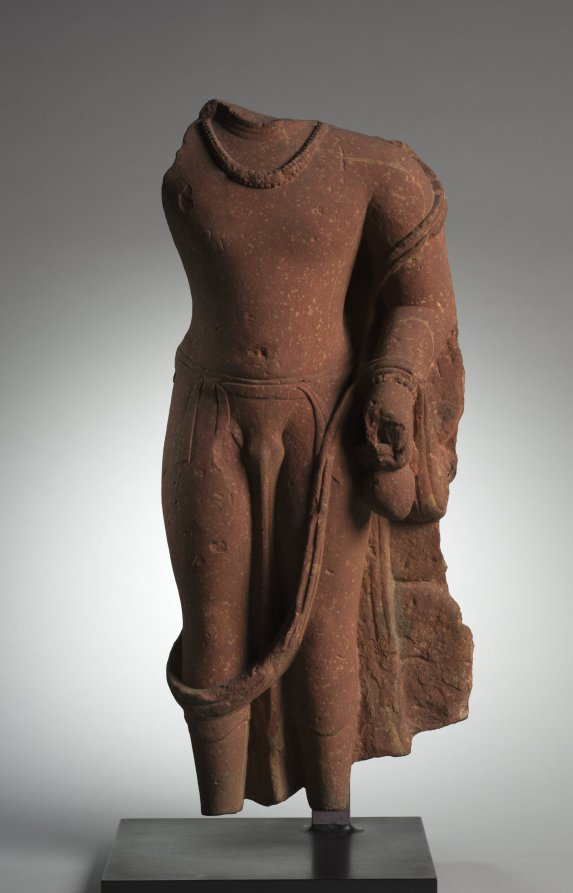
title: Naga (Serpent Divinity)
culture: India, Mathura, Kushan period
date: 300s CE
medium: sandstone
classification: Sculpture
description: The coils of a serpent's body and the bottle of water in his hand confirm the identity of this figure as a water serpent divinity called a naga. Nagas continue to be important divinities in local piety, for they control the forces of water, essential for prosperity.